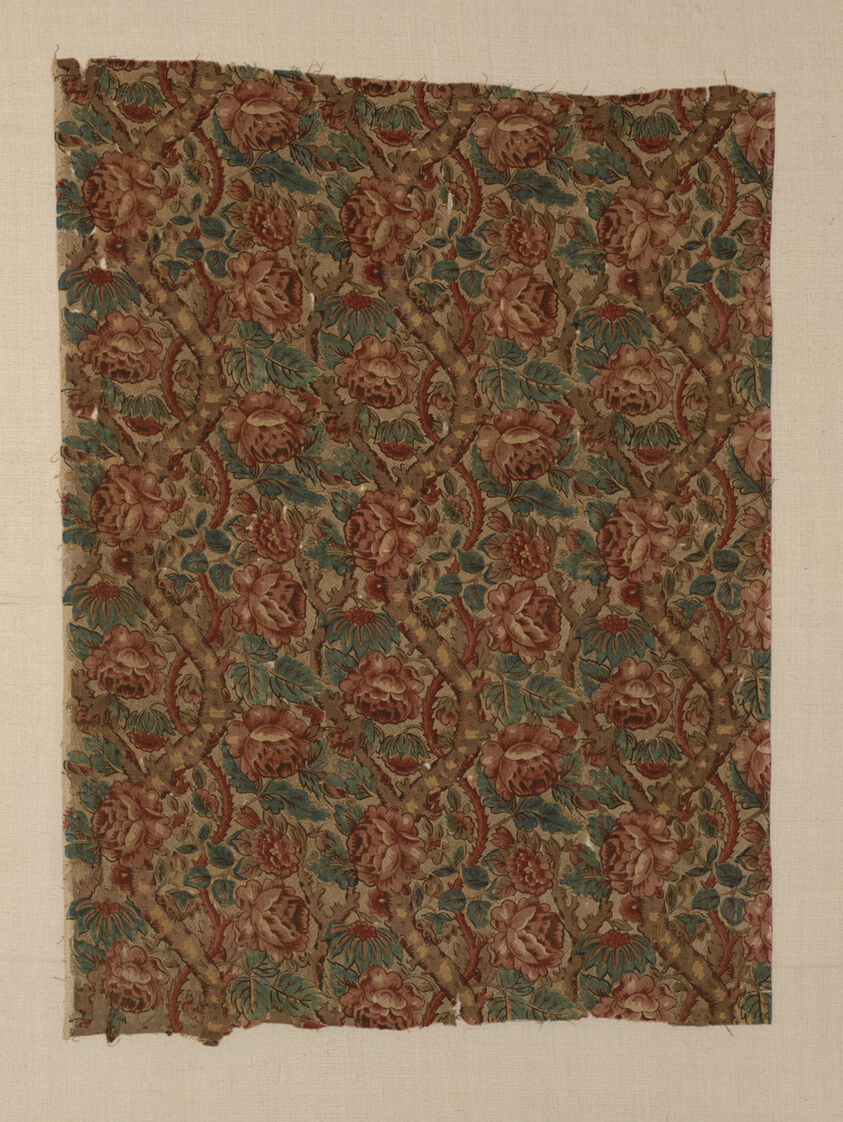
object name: Textile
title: Fragment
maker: England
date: 19th century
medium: Cotton, plain weave; block printed; glazed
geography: England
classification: textile; weaving - printed